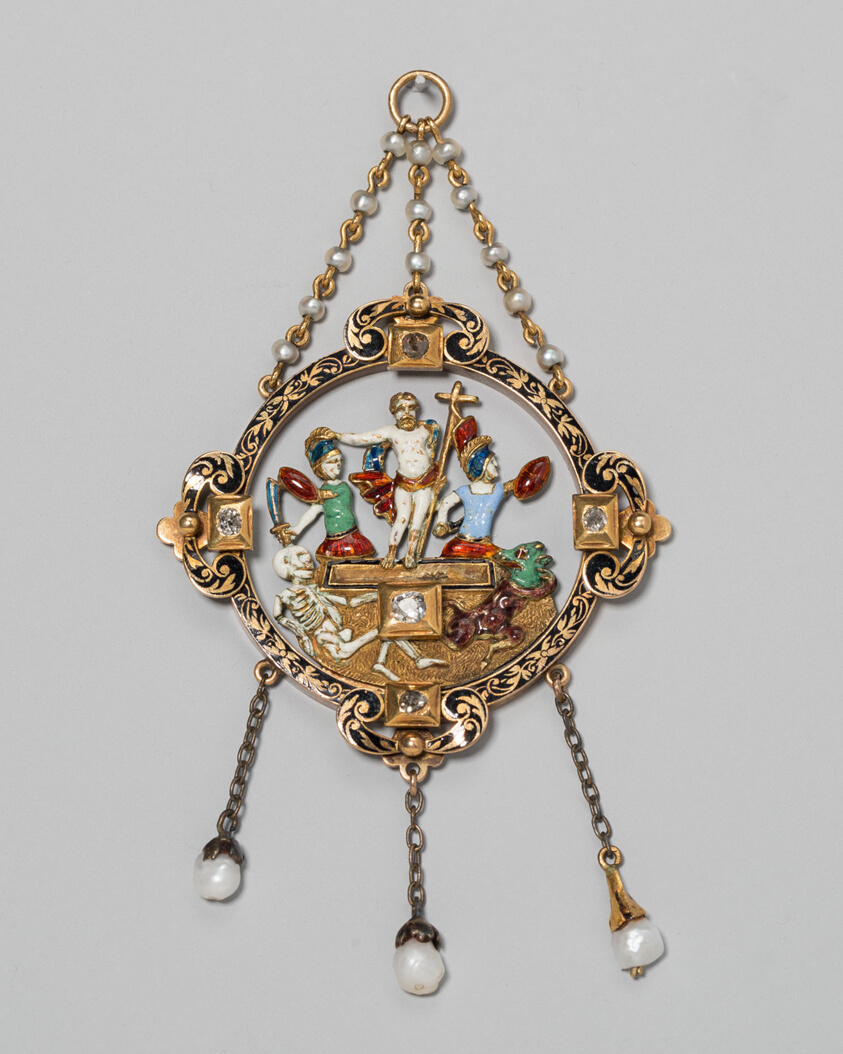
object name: Costume and Accessories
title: Pendant with Resurrection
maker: Northern European, possibly Austrian (Vienna)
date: 1850/1900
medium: Gold, enamel, diamonds, and pearls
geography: Northern Europe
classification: pendant (jewelry); jewelry; european decorative arts; costume